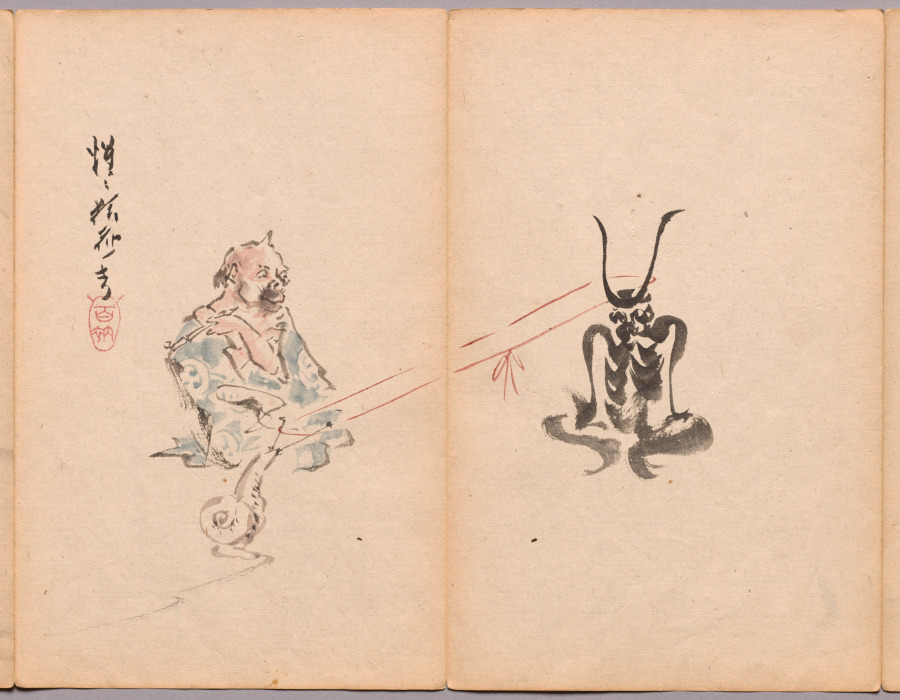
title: Snail Versus Demon from Sketch Album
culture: Japan, Edo period (1615–1868) to Meiji period (1868–1912)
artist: Kawanabe Kyōsai (Japanese, 1831–1889)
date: mid- to late 1800s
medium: Accordion-style book of 26 double-leaves; ink and color on paper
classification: Bound Volume